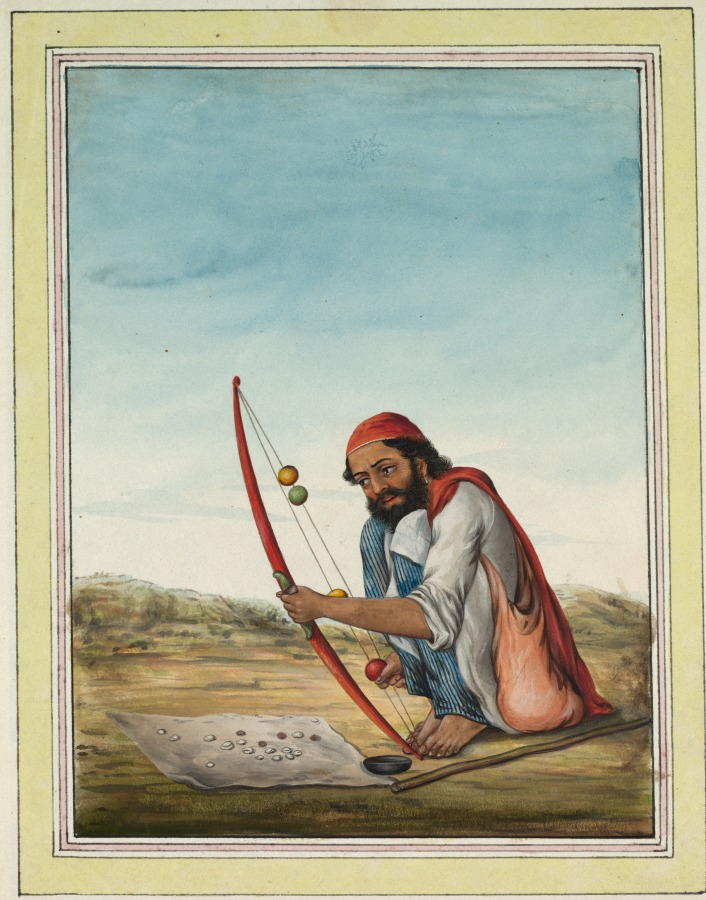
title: Juggler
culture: India, Company School, Lucknow or Patna, 19th century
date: c. 1840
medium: ink and gouache on paper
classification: Painting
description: A page from a book of paintings that would have included images of various entertainments in India, this painting is rendered in a European style for British consumption. The label Juggler is written in a Victorian-era hand in the margin below. The main figure is seated on the ground with his knees drawn tightly up under his chin, reinforcing a Western stereotype that all Indian people can do physical feats with their bodies, like yogis. On display are his talents of manipulating balls on a two-stringed bow, called “juggling” by the British owner of the painting for lack of a better moniker. His performance was intended to create a spectacle for entertainment and income. This painting would have been made for sale too, in the new economy under British dominance in which Indian artists made documentary pictures for foreign overlords.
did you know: Cowrie shells, in front of him, were used as money.